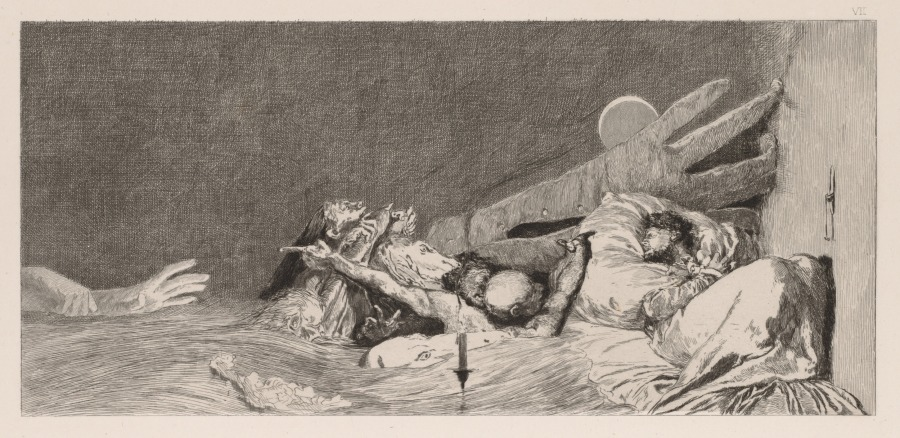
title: A Glove: Anxieties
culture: Germany, 19th century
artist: Max Klinger (German, 1857–1920)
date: 1880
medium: etching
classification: Print